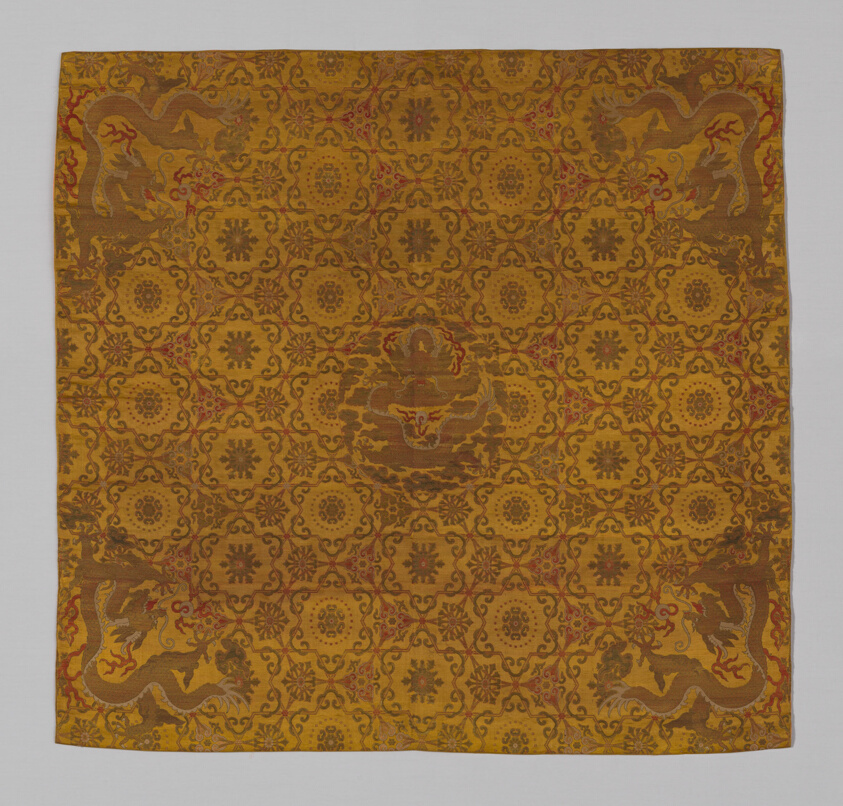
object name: Textile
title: Panel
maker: China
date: 1875/1900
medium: Decoration in brick red, blue, green and grey on beige ground. Main panel: lotus rosettes and scroll foliage in red. Series of borders on either side: Each third: Decoration in brick red, blue, green and grey on beige ground. Main panel: lotus rosettes and scroll foliage in red. Series of borders on either side: 1, narrow butterflies and floral scrolls in green; 2, chrysanthomun rosettes and scroll foliage in red; 3, narrow lotus and foliage in grey; 4, all over chrysanthamun and swastika in blue.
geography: China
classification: textile; weaving